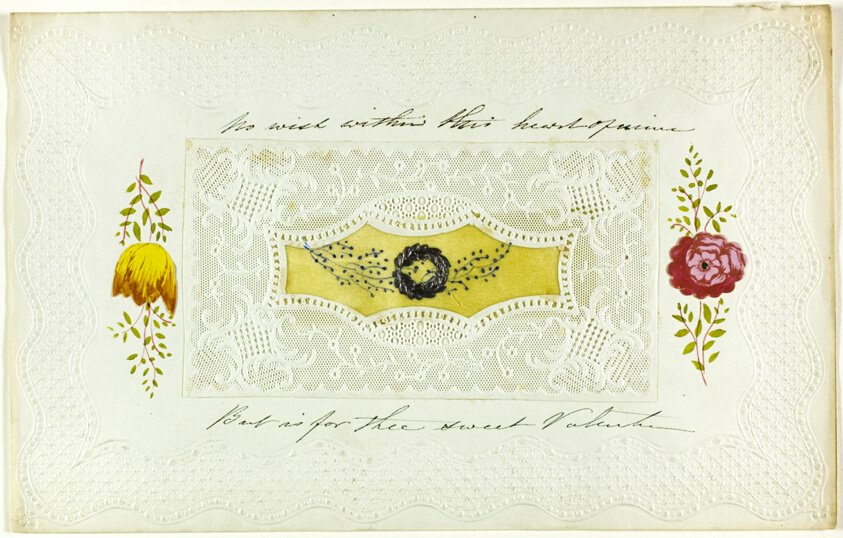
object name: Drawing and Watercolor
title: No Wish within this Heart of Mine (valentine)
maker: Unknown Artist; English, 19th century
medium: Collaged elements and watercolor, with pen and black ink on cut and embossed ivory wove paper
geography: England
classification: valentine; prints and drawing; paper